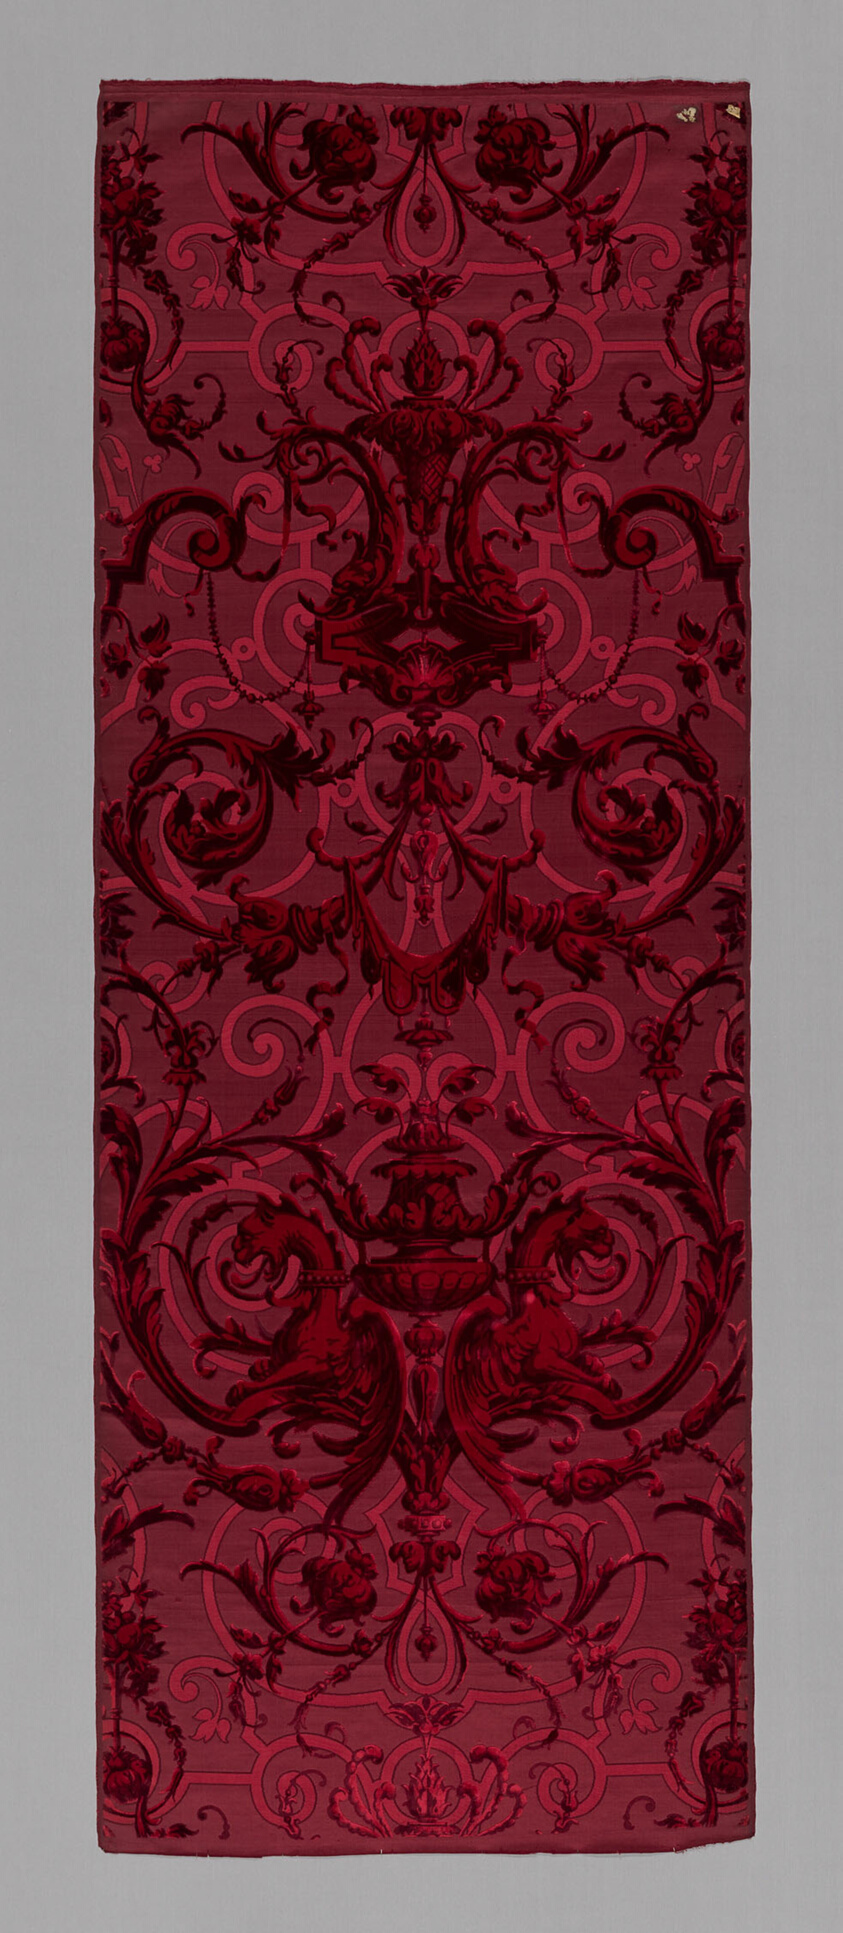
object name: Textile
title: Panel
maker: Produced by Mathevon et Bouvard, 1810–1895; France, Lyon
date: 1860/80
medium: Silk, satin weave with multi-color supplementary pile warps forming cut and uncut voided velvet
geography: Lyon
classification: textile; weaving - velvet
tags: foliage, swags